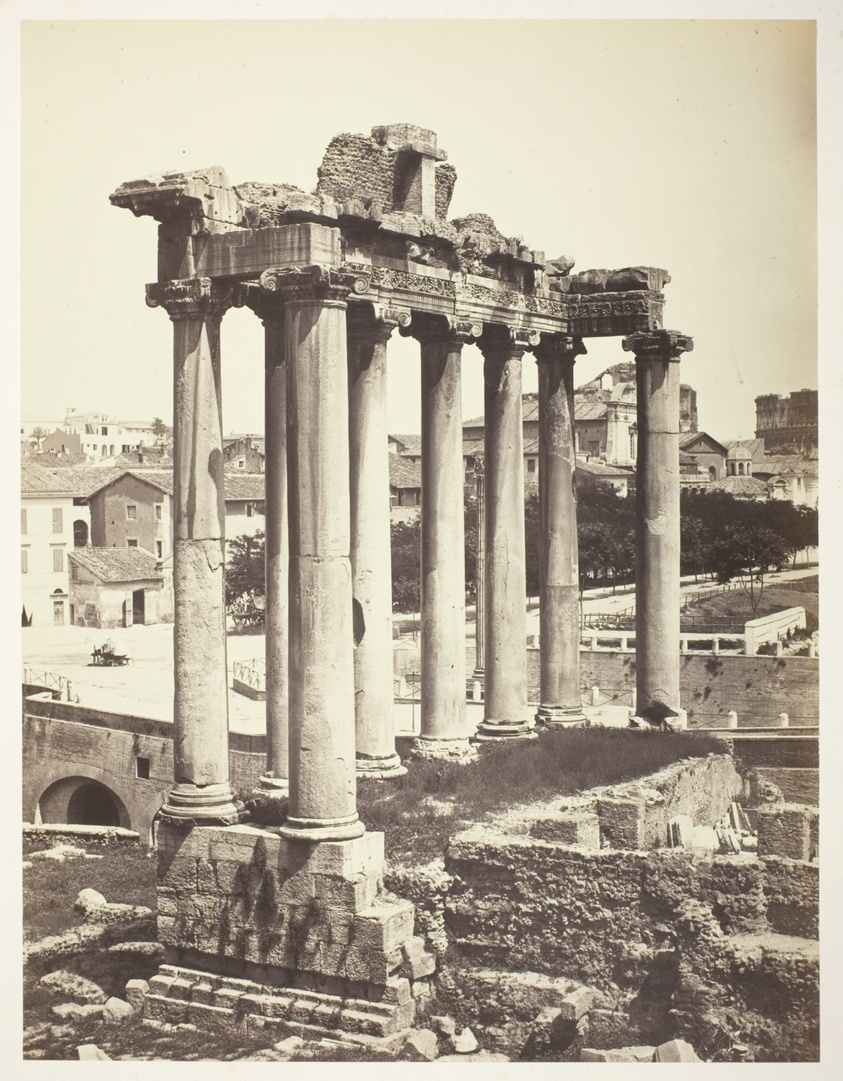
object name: Photograph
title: Forum Romanum, Rome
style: 19th century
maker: Bisson Frères (Louis-Auguste Bisson, French, 1814–1876 and; Auguste-Rosalie Bisson, French, 1826–1900)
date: 1854/57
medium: Albumen print, from the album "Reproductions photographiques des plus beaux types d’architecture et de sculpture"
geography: France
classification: albumen silver print; photographic process; photography; photograph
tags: Collected by Hugh Edwards, architecture